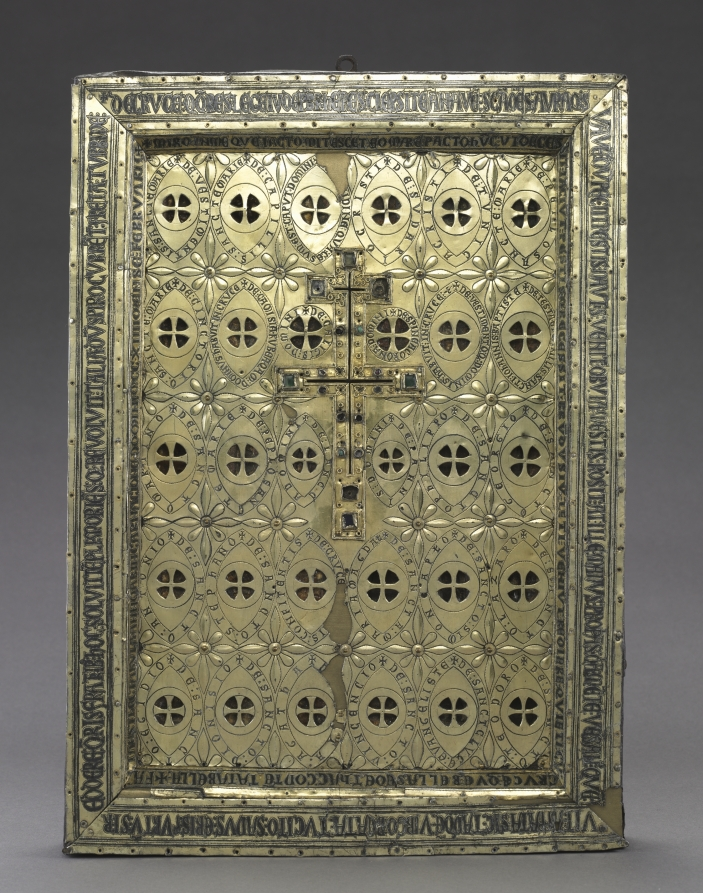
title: Reliquary of the True Cross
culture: Cross: Latin Kingdom of Jerusalem Panel: Rhine-Meuse region, Gothic period, 13th century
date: c. 1214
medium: silver, gilded silver, niello, precious stones, walnut core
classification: Metalwork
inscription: the Latin inscription on the border of the cover, written in gothic characters, translates as follows: "If you want information about the cross, read this: A priest, a true descendant of Judas, stole the relic and boarded a ship. Instead of the fair breeze he was wishing for, the aggrieved sailors ran into a tempest. The priest became raving mad to the point of gnawing his own hands. The Virgin Mary appeared to him and said: 'You will immediately recover your wits if you undertake to give back what you robbed.' He thereupon bequeathed the relic to the Knights Templars and agonized, brooding on himself: 'As long as I breathe, the waves will form horrible whirlpools. If I am thrown into the sea, it will quiet down.' He gave up the ghost and was thrown overboard. The pilgrims happily disembarked at Brindisi and returned peacefully to their country with the relic of the cross which you see beautifully set in its container. The panel-shaped reliquary was made in the year of the incarnation 1214 in the month of February." On front, Latin inscriptions listing the relics run between the inner and outer lines of the ovals and inside the two roundels not circumscribed by an oval.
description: A lengthy Latin inscription on the frame recounts the history of the central relic--a fragment of the True Cross--and provides an exact date for its container: "You who ask about the cross: read! The heir of Judas the priest/Stole it. But when, after boarding a ship,/He sought a mild breeze, a fierce storm opposed the sorry sailors./Out of his mind, he gnawed at his own hands./In the end the blessed Virgin spoke thus to him:/‘You shall soon be well, if you seek to return what was stolen.’/ He pays back this debt to the brothers of the Temple . . . When he died, they cast him overboard, and the storm subsided./Happy they arrive at Brindisi, quiet they have returned with the cross,/Which resides beautiful in this handsome panel. This tablet was created in the 1214th year from the Lord’s incarnation in the month of February."